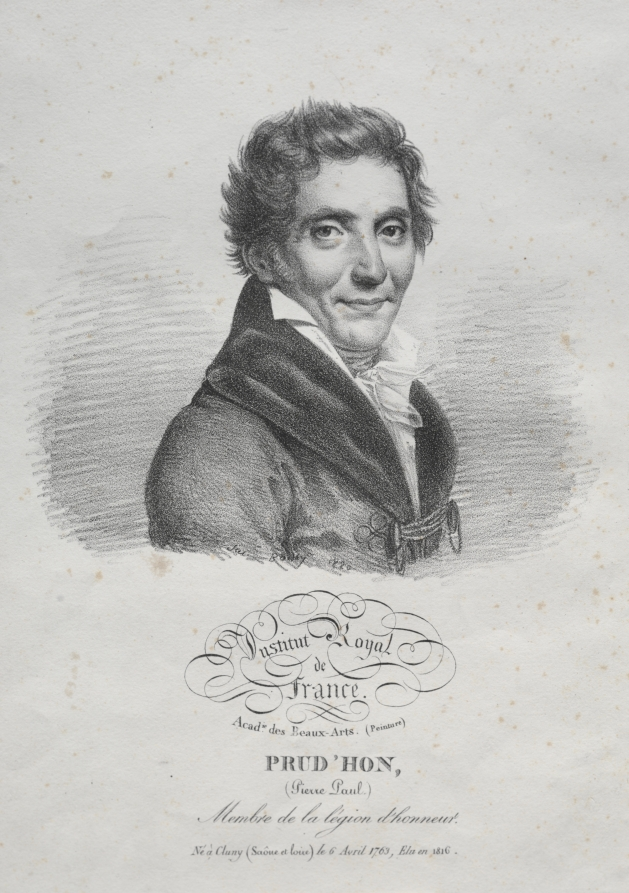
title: Pierre Paul Prud'hon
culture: France, 19th century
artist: Julien Léopold Boilly (French, 1796–1874)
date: 1820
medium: lithograph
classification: Print